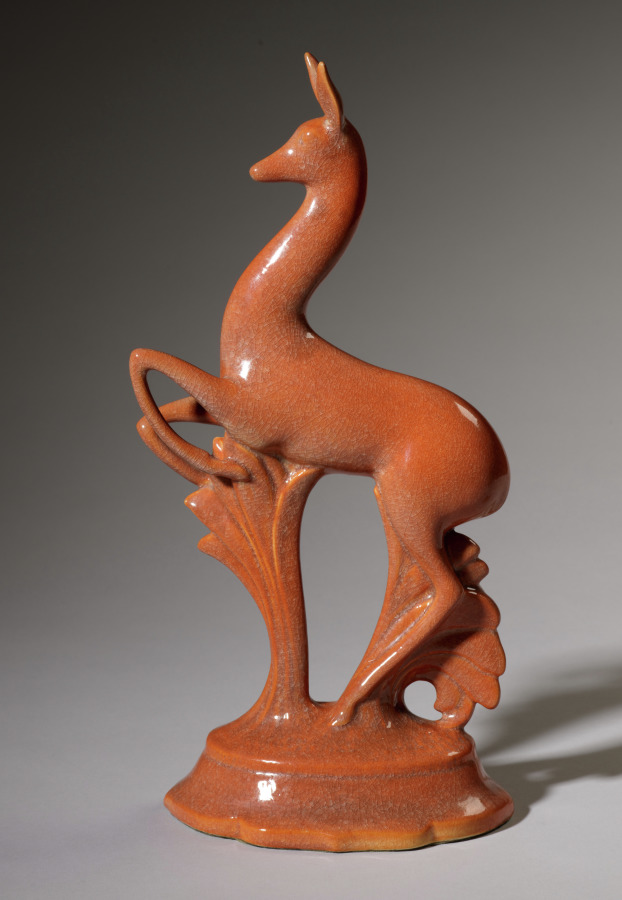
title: Fawn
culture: America, Ohio, Cleveland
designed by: Waylande Gregory (American, 1905–1971)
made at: Cowan Pottery Studio (America, Ohio, Rocky River, 1920–1931)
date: 1929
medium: earthenware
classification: Ceramic